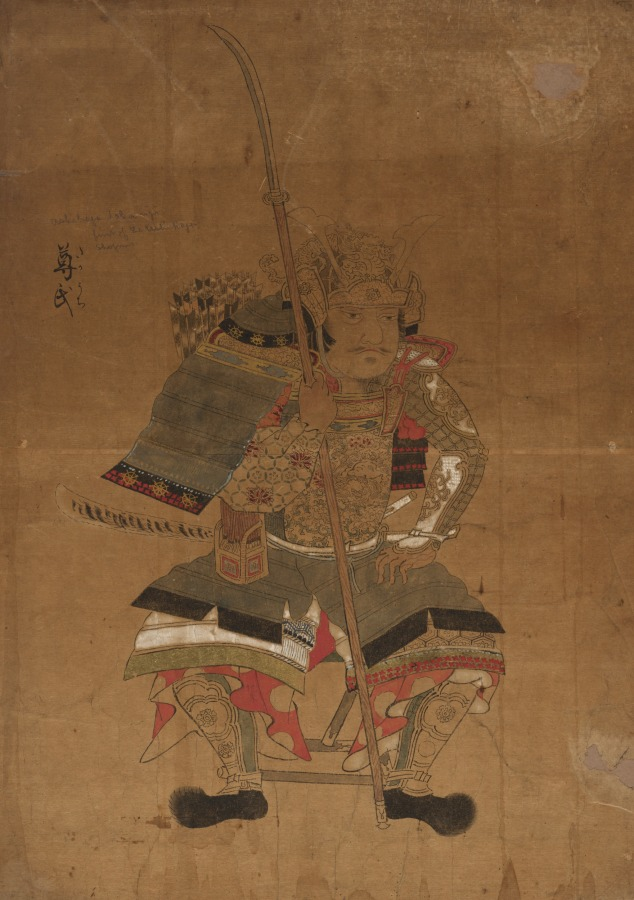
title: Sketch Model for Portraits of Ashikaga Takauji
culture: Japan, Edo period (1615–1868)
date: 1615–1868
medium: Ink and color on paper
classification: Painting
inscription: 尊氏 （漢字）たかうち（ふりがな）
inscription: Ashikaga Taka-uji first of the Ashikaga Shoguns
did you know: Kegutsu, or fur shoes, like the ones worn by Takauji were often made of bear fur.